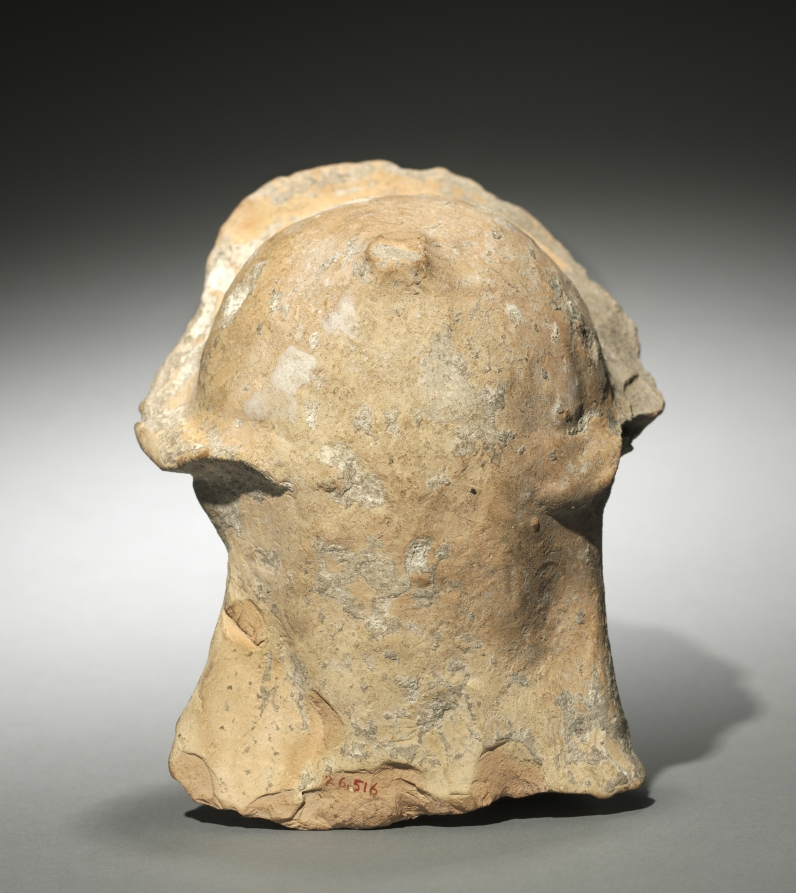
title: Woman's Head with Crown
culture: Greece, Sicily(?)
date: 500s BCE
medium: terracotta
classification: Sculpture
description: This terracotta sculpture depicts a woman with a wide headdress that is partly broken off. Her face is rendered in an Archaic style, with her mouth and eyes in low relief and her lips lifting upward in a serene smile. Originally, details such as the eyes and decoration on the headdress would probably have been painted on the surface of the sculpture.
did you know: In ancient Greek sculpture, a wide crown often denoted a matron deity like Hera or Demeter.